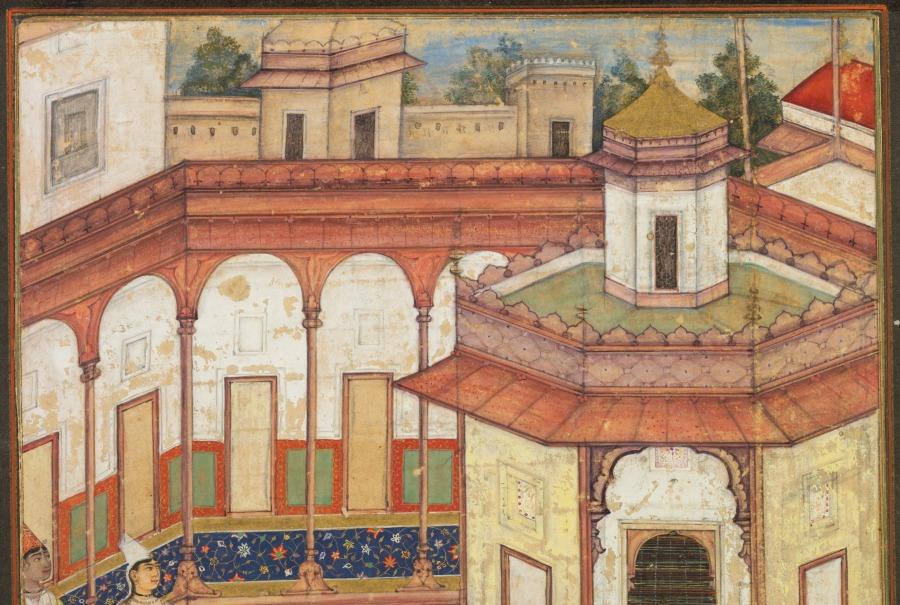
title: A Man Dips His Hand into a Cauldron as Ladies of the Harem Stand in Amazement: A Page from a Manuscript of Religious History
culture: Mughal India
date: c. 1600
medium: Gum tempera and gold on paper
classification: Painting